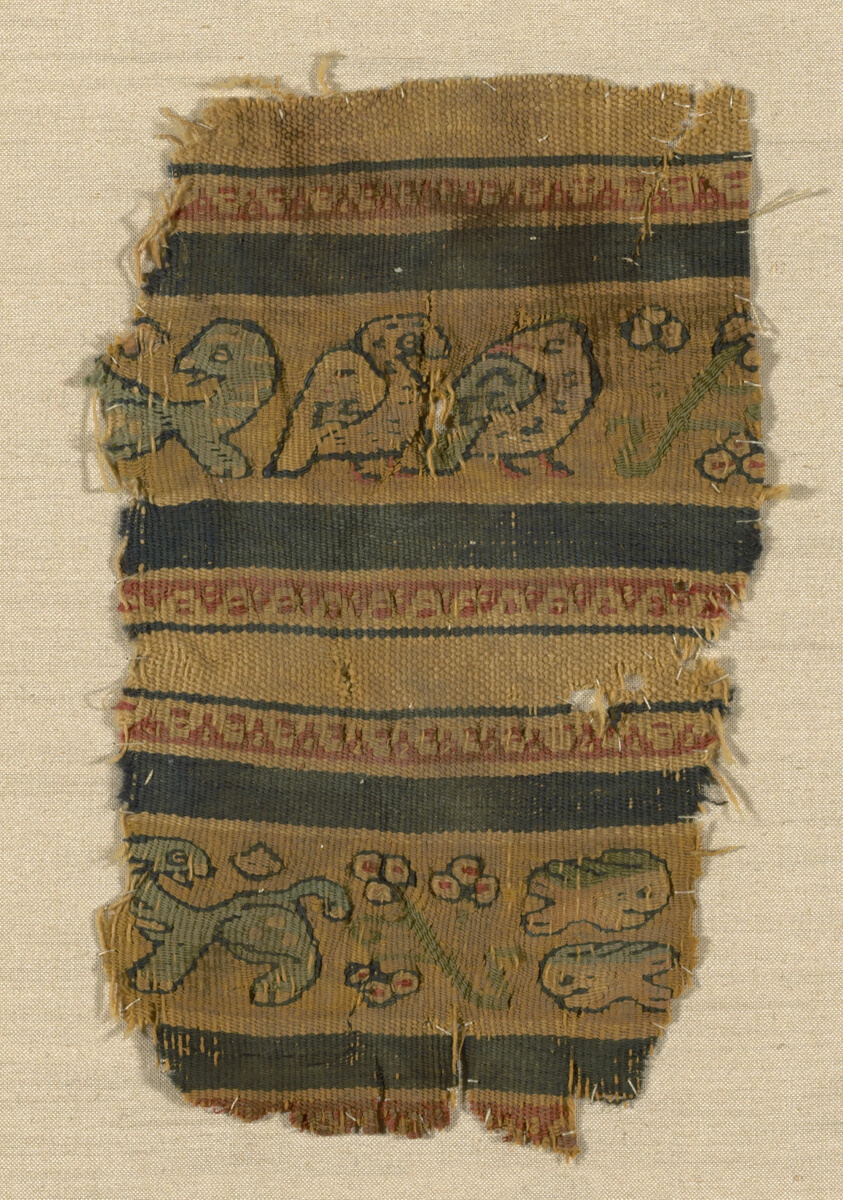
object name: Textile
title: Fragment (Border)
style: roman period (egyptian), greco-roman (egyptian), coptic (period)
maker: Coptic; Egypt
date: Roman period (30 B.C.– 641 A.D.), 1st/5th century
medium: Linen and wool, tapestry weave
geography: Egypt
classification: textile; weaving